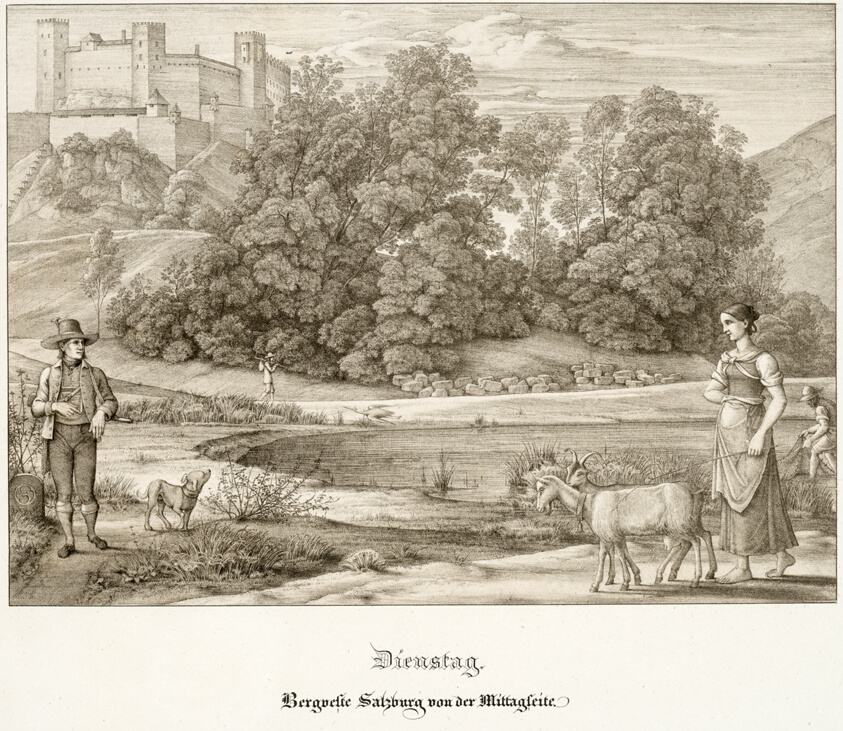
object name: Print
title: Tuesday: The Castle of Salzburg Seen from the South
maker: Ferdinand Olivier (German, 1785-1841)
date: 1823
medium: Lithograph with tint-stone on white wove paper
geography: Germany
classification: lithograph; print; prints and drawing